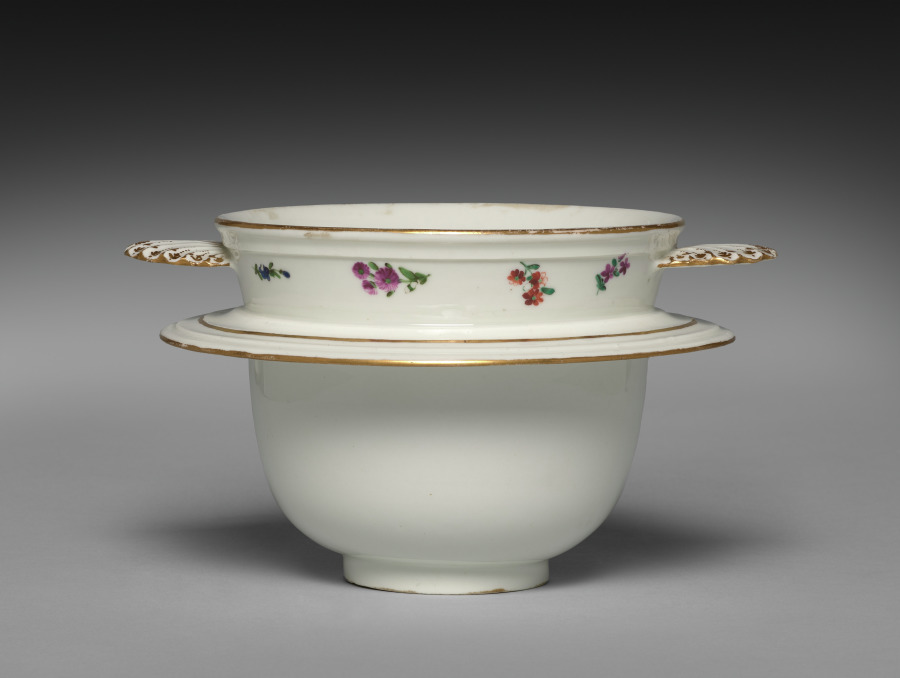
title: Food Warmer (Veilleuse) [Food Container]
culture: Germany, Nymphenburg, 18th century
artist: Meissen Porcelain Factory (German, est. c. 1710)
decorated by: probably by Georg Christoph Lindemann (German)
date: c. 1758– 1760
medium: porcelain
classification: Ceramic